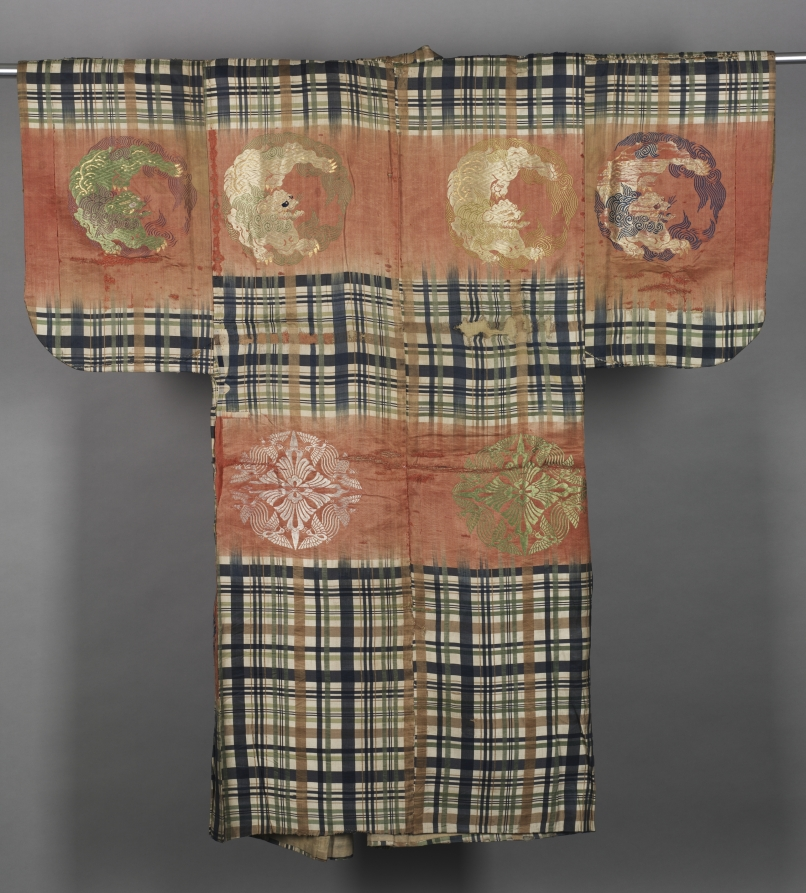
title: Noh Costume (Atsuita)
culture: Japan, Edo period (1615–1868)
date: 1800–1850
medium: Silk: twill weave with supplementary weft, brocaded; metal thread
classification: Garment